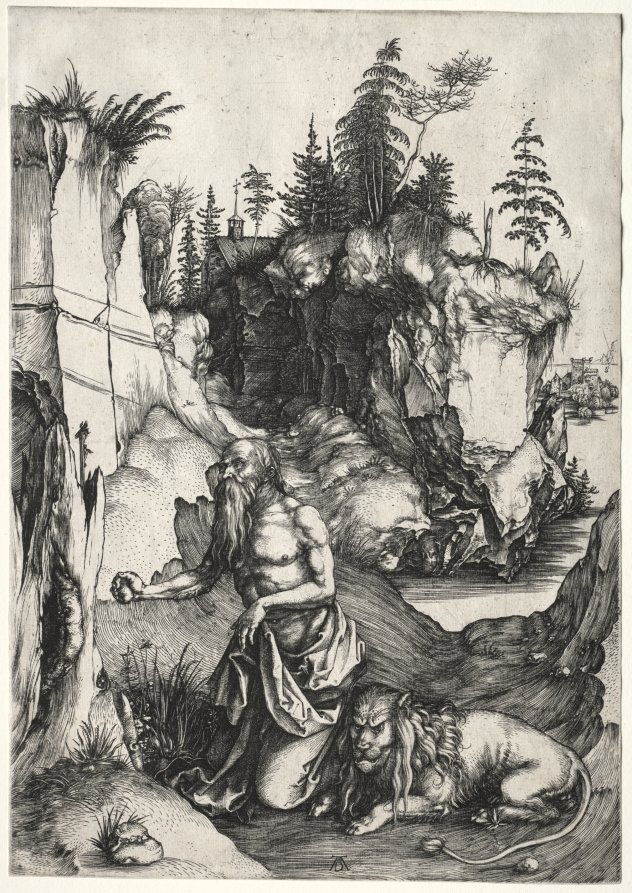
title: St. Jerome in Penitence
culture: Germany, late 15th Century early 16th Century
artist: Albrecht Dürer (German, 1471–1528)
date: c. 1497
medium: engraving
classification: Print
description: This print shows Albrecht Dürer’s interpretation of Saint Jerome in the wilderness. In this image, the saint is a gaunt penitent who kneels in front of a small crucifix placed on top of a tree stump (a reference to Christ’s cross and the tree of knowledge), while holding a rock in his right hand. Jerome was said to have beat his chest with a rock to alleviate his frequent hallucinations. Dürer included several different plant species, all Northern European in origin, displaying his dedication to the careful study and depiction of real plants.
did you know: According to legend, after he aided a lion by pulling a thorn from its paw, it became Saint Jerome's permanent companion.